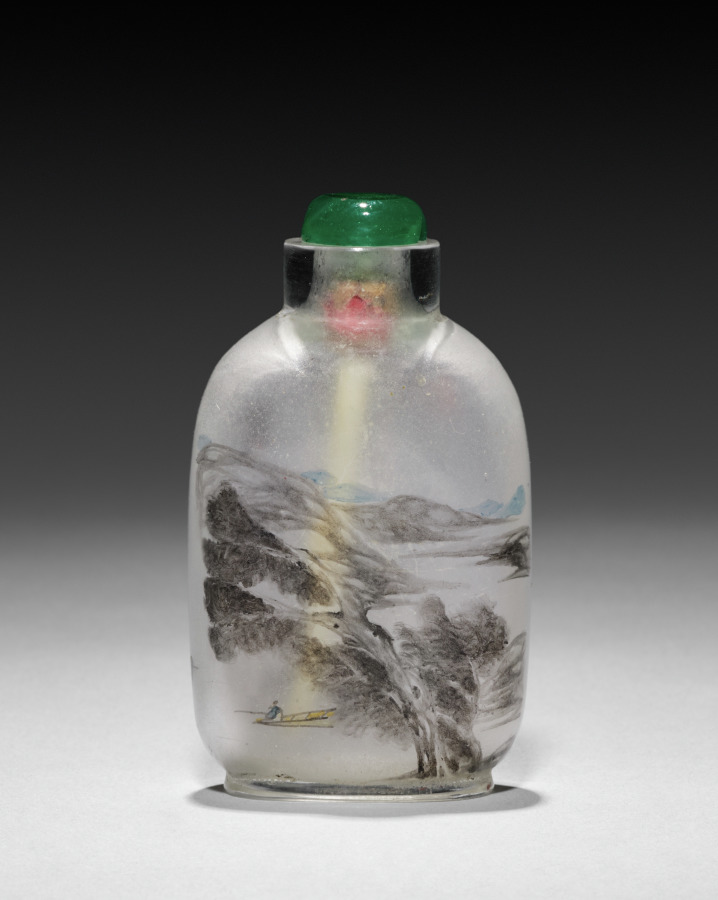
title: Snuff Bottle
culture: China, Qing dynasty (1644-1911)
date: 1644–1911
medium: glass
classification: Glass